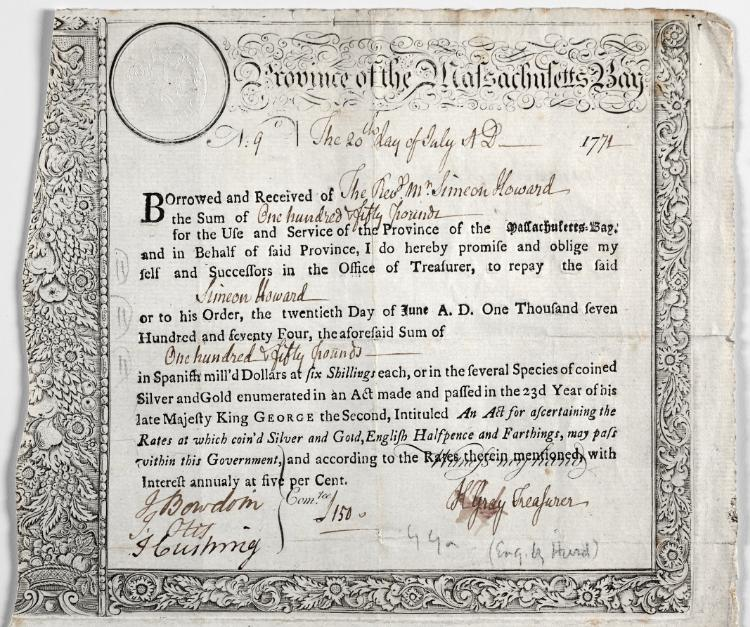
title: Loan Certificate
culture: America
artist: Nathaniel Hurd (American, 1730–1778)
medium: engraving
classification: Print